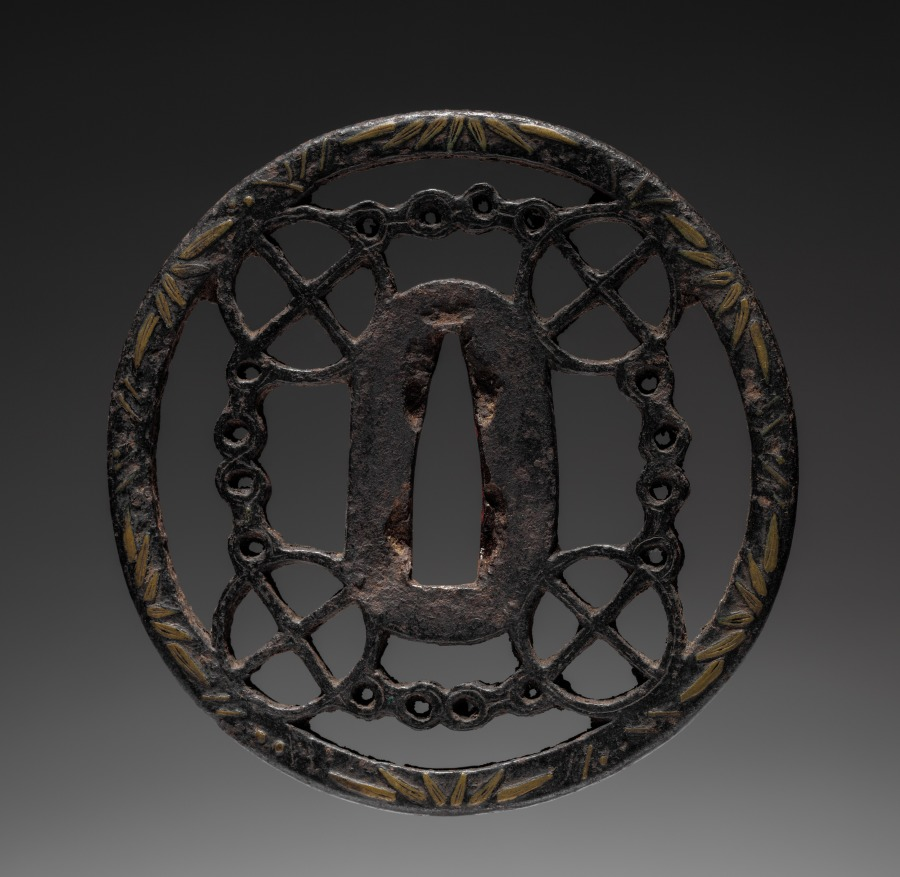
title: Sword Guard (Tsuba)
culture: Japan, possibly Edo period (1615-1868)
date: c. 1615–1868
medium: iron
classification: Arms and Armor